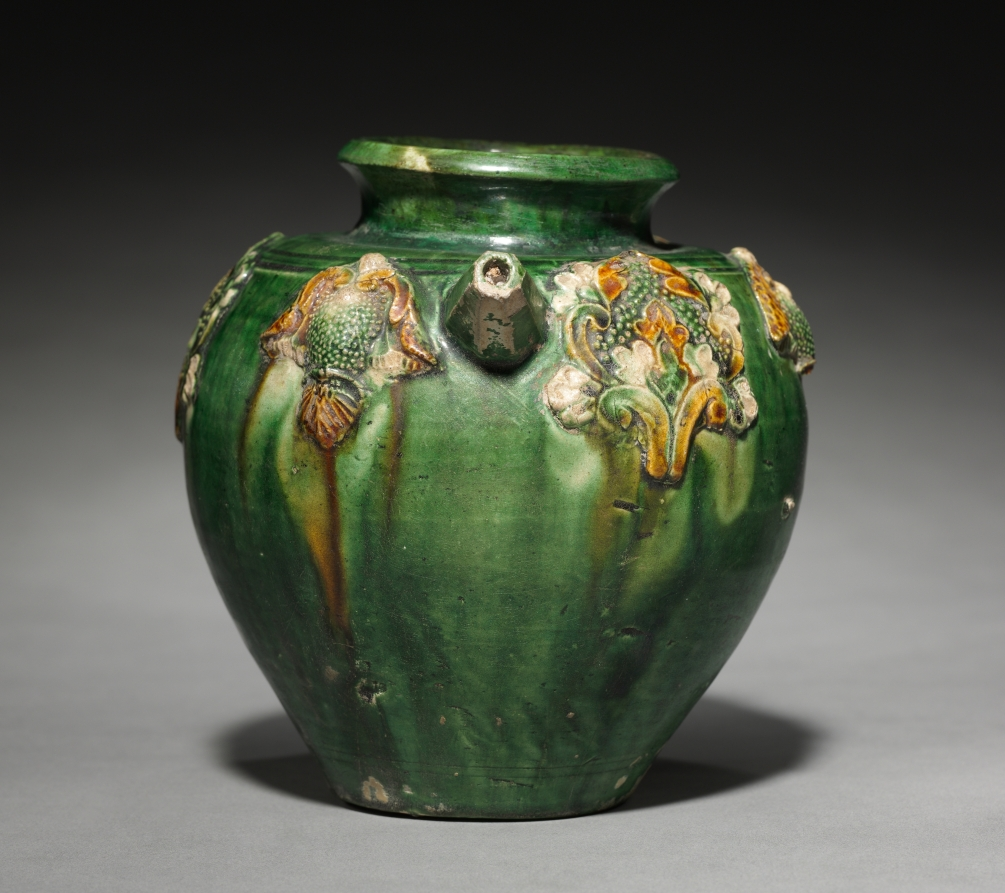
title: Jar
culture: China, Tang dynasty (618-907)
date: late 600s–700s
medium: pottery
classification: Ceramic